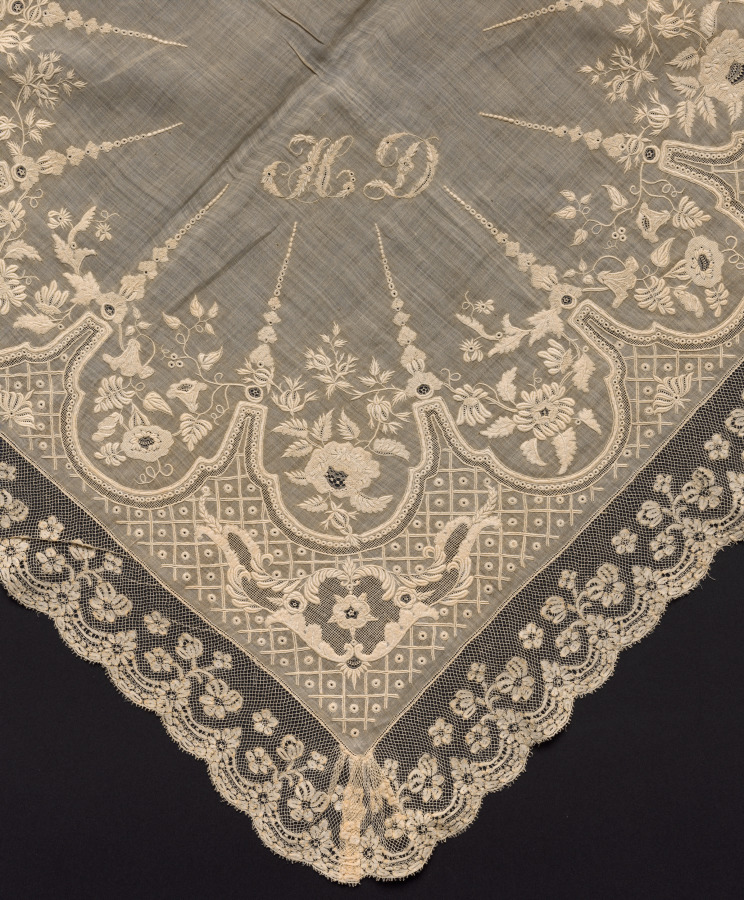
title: Lace Handkerchief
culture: France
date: 1800s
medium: Plain weave linen center: needle lace (drawnwork), bobbin lace (Valenciennes lace) edging, and embroidery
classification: Embroidery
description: The initials H. D. are embroidered in the center of this handkerchief.